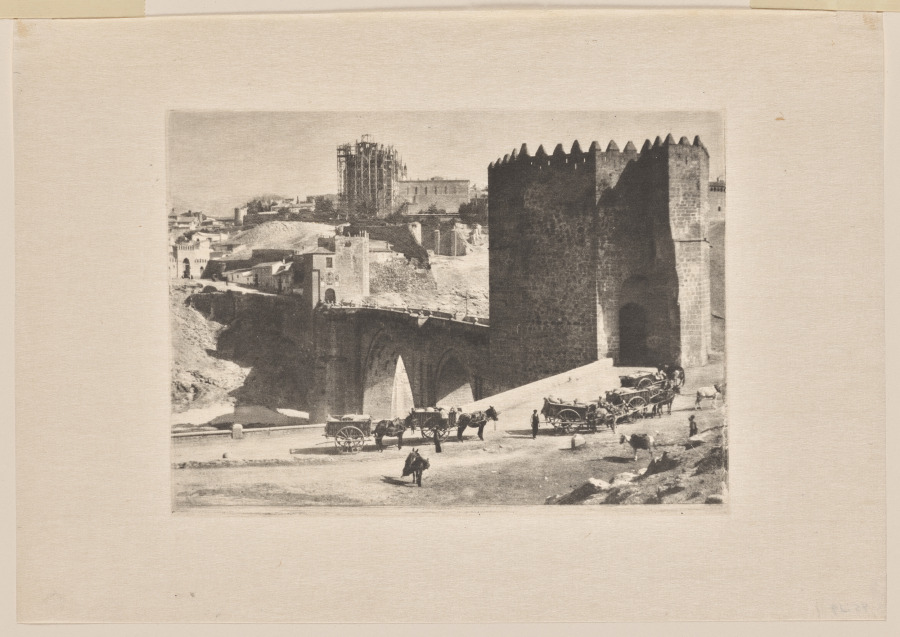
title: Bridge of St. Martin, Toledo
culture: Scotland, 20th century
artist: J. Craig Annan (British, 1864–1946)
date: 1914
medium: Rotogravure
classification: Photograph